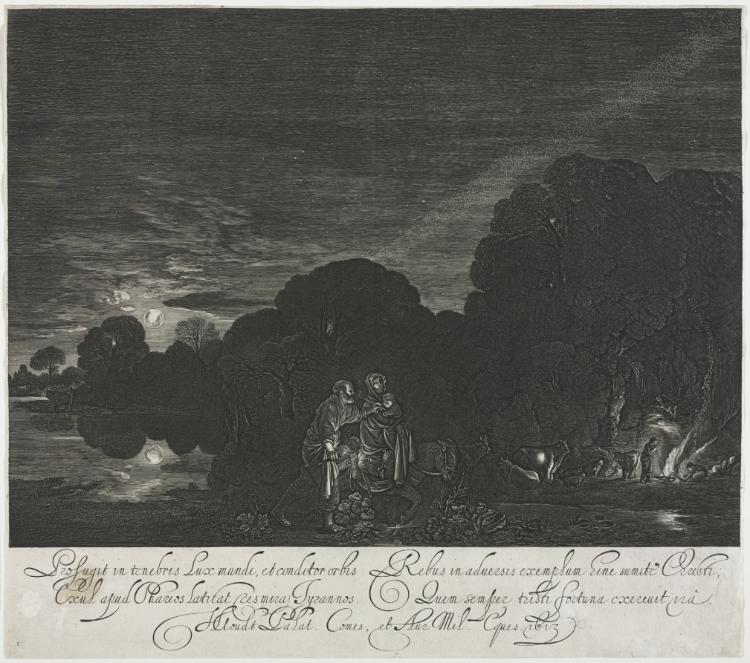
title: The Flight into Egypt (Night)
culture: Netherlands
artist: Hendrik Goudt (Dutch, 1583–1648)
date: 1613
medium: engraving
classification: Print